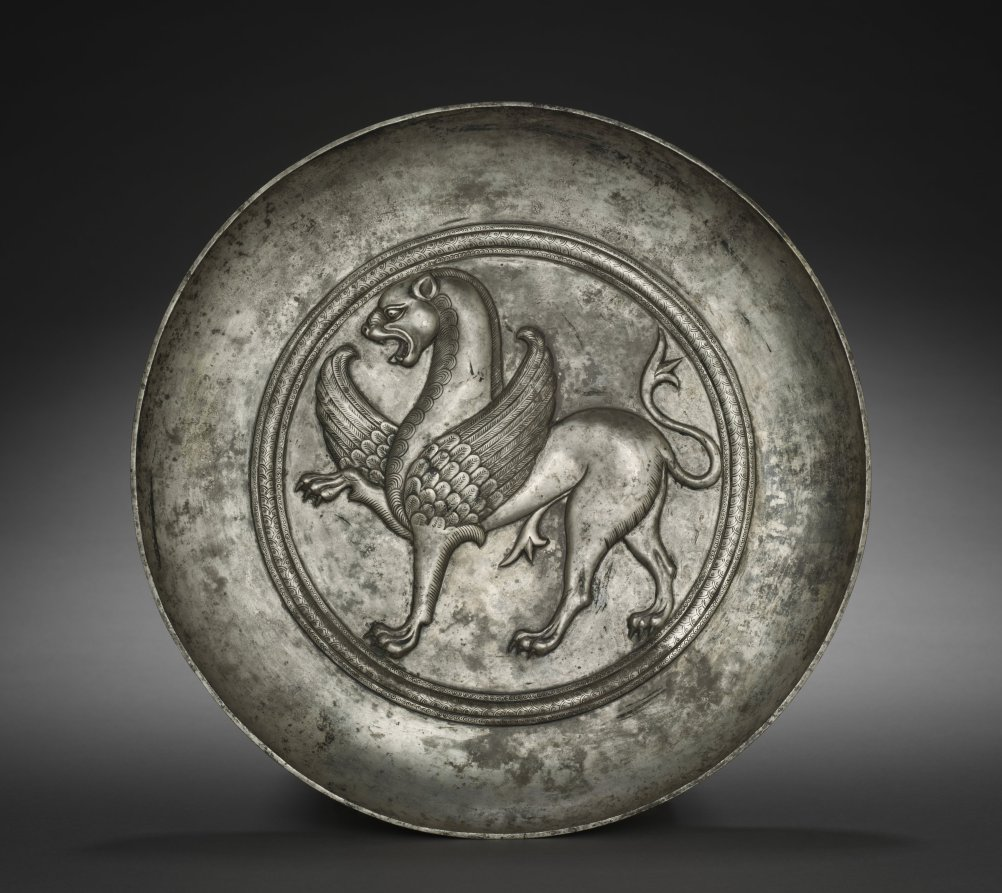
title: Plate with Winged Griffin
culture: Soghdia, Hephtalite period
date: 500s–600s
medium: silver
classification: Silver